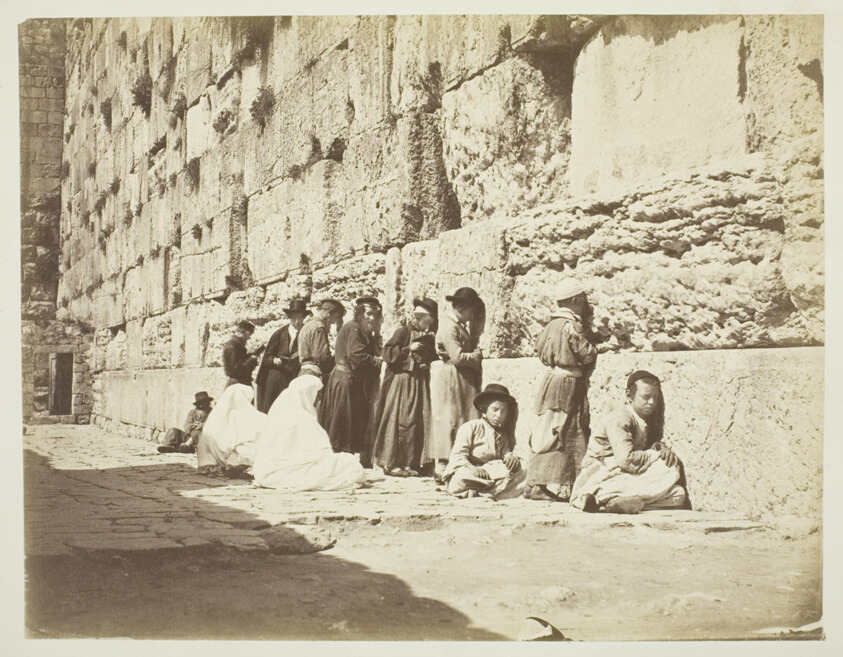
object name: Photograph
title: Wall of Solomon's Temple, Jews' Wailing Place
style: 19th century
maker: Artist unknown; 19th century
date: c. 1860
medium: Albumen print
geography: Yerushalayim district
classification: albumen silver print; photographic process; photography; photograph